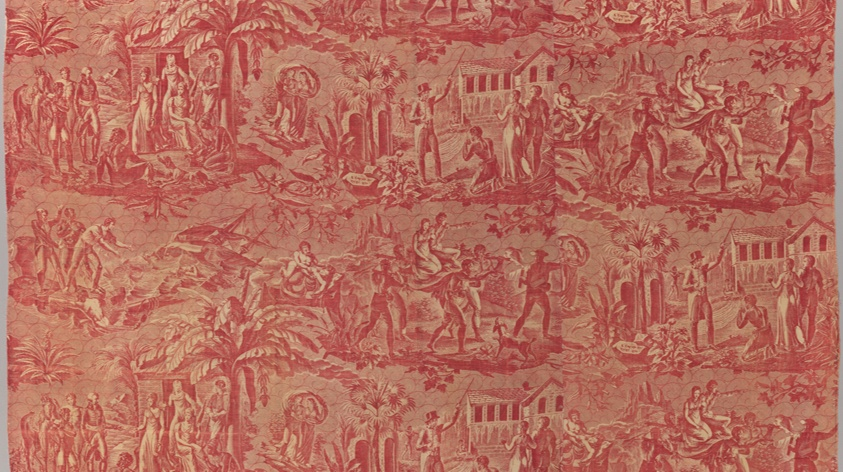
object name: Textile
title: “Paul and Virginie” Furnishing Fabric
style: 19th century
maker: Based on the story by Bernardin de Saint-Pierre (French, 1737-1814)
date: c. 1800-10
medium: Cotton; roller printed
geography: France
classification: weaving - printed; textile; printed textile; furnishing textile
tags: people, trees, dogs, children, friendship, island, love, ships, wreckage